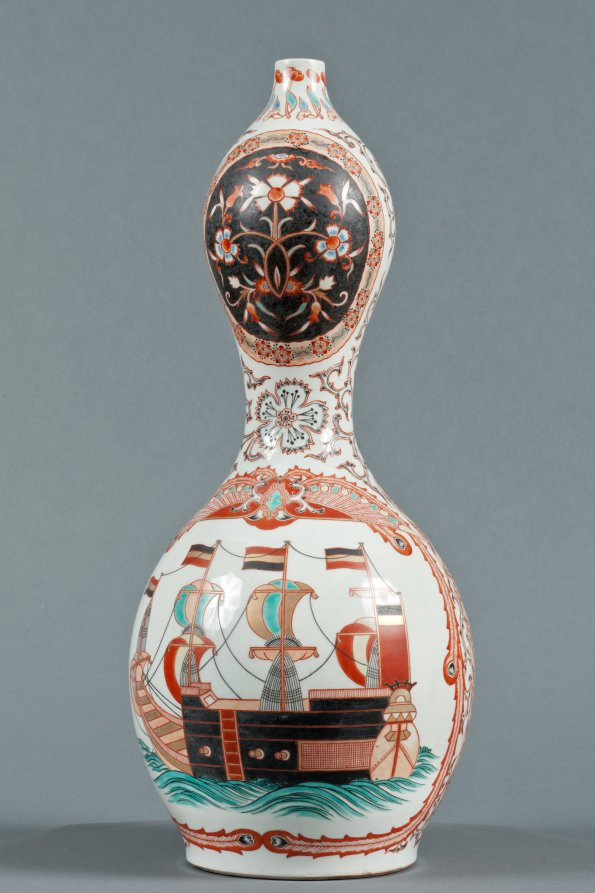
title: Bottle with Western Ships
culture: Japan, Edo period (1615–1868)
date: c. 1800–1868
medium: Porcelain with decoration in colored enamels and underglaze blue, overglaze enamels, and gold (Hizen ware, Arita type)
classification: Ceramic